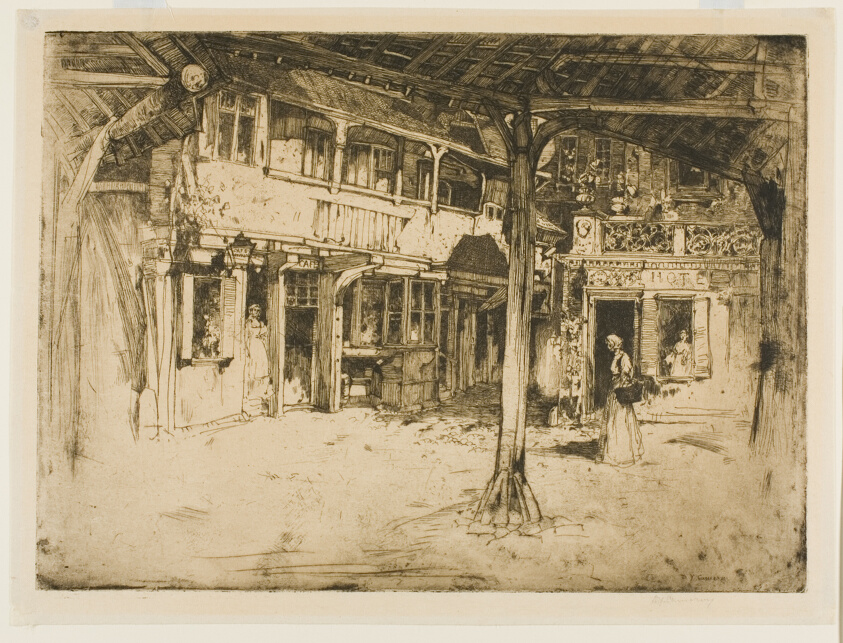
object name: Print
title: Cour des bons Enfants, Rouen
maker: David Young Cameron (Scottish, 1865-1945)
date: 1897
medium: Etching on buff laid paper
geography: Scotland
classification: etching; print; prints and drawing